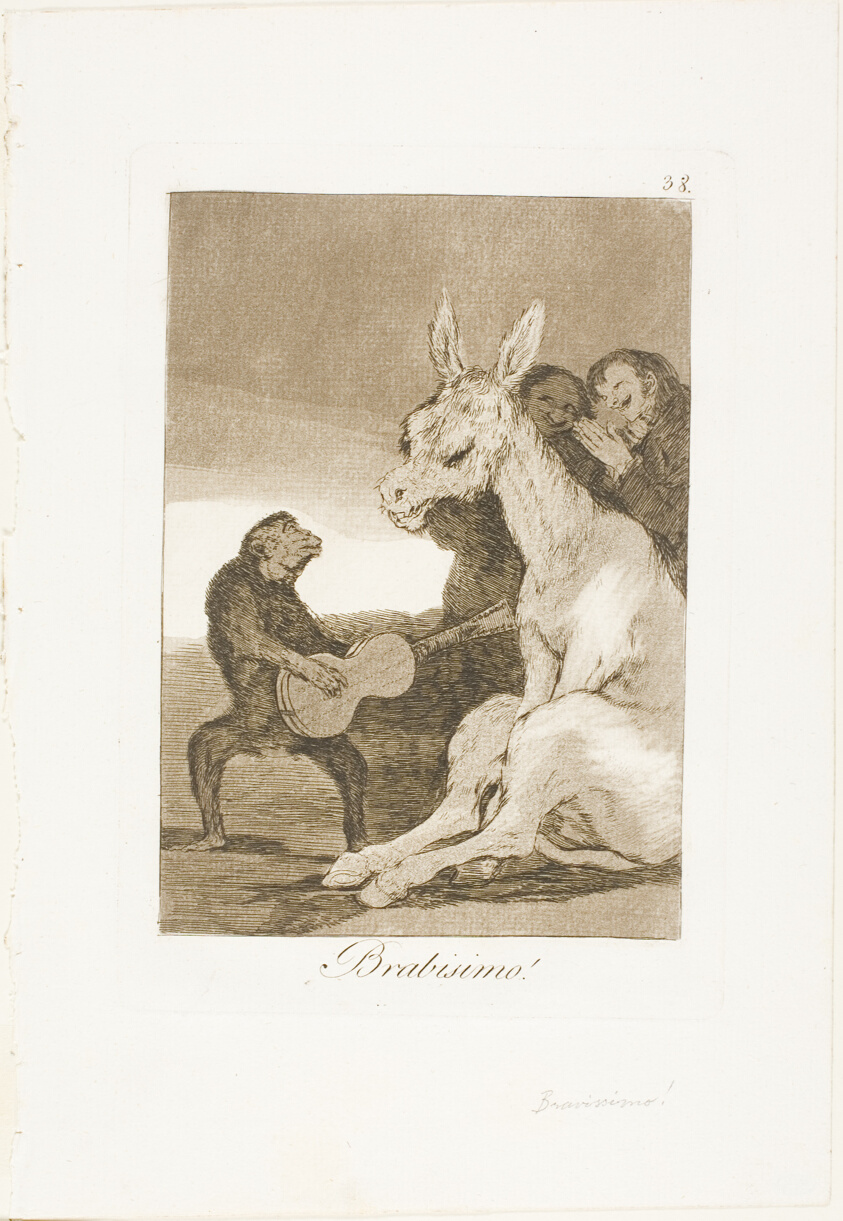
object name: Print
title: Bravo!, plate 38 from Los Caprichos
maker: Francisco José de Goya y Lucientes (Spanish, 1746-1828)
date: 1797/99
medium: Etching and aquatint on ivory laid paper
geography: Spain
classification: etching; print; prints and drawing